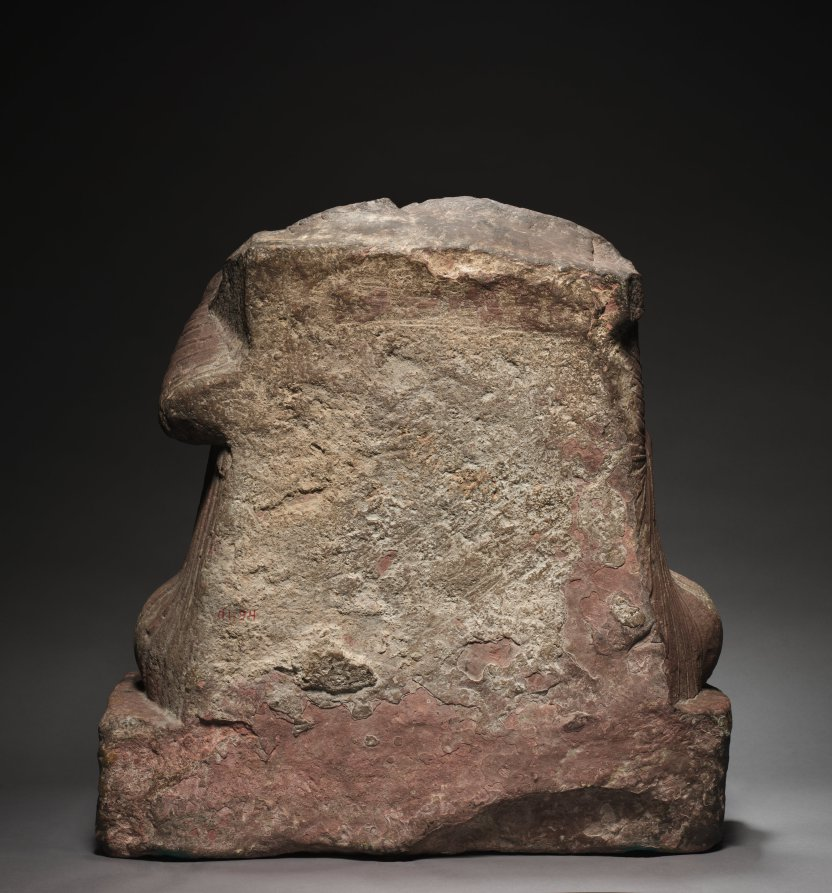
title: Seated Buddha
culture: Northern India, Mathura, Kushan period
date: 200s CE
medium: sandstone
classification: Sculpture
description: Artists in the north Indian city of Mathura reinterpreted the appearance of the Greco-Roman style of drapery, which was popular in the region of Gandhara, in present-day Pakistan. They preferred a more otherworldly, abstracted rendition of the folds, giving the Buddha a powerful, superhuman energy.